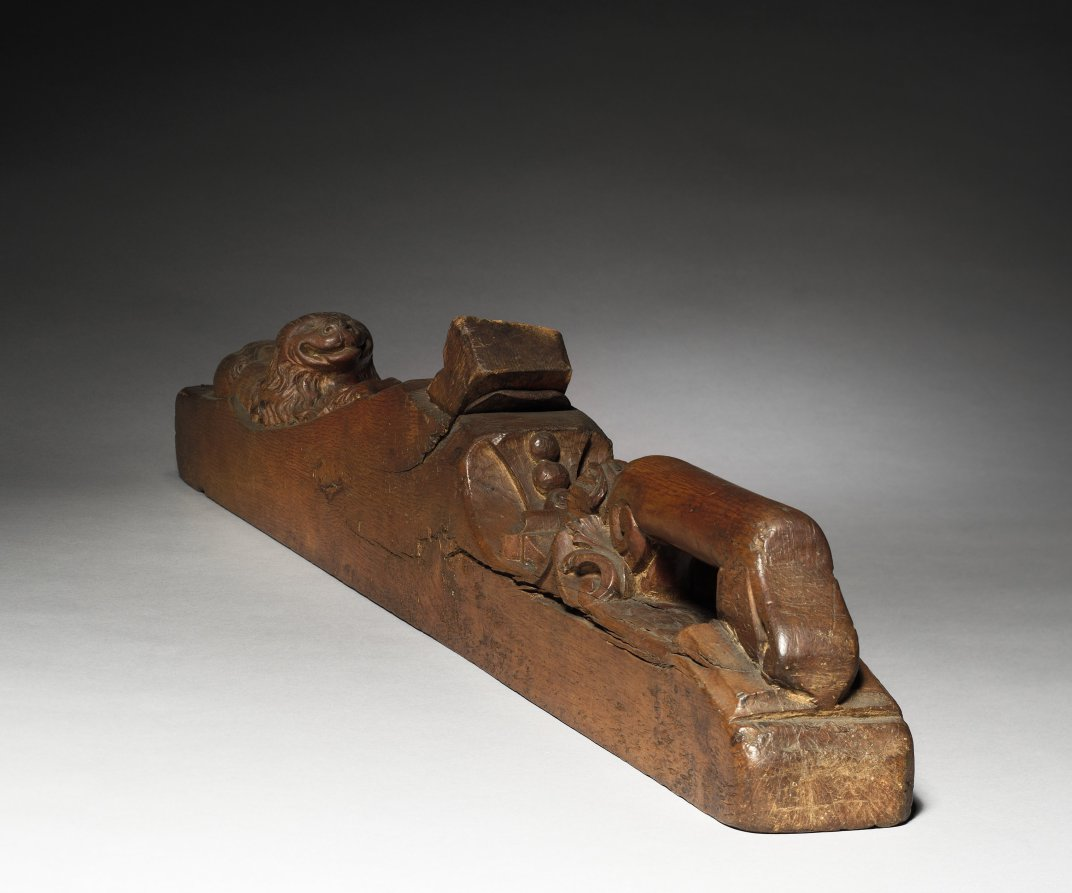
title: Plane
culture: Spain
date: 1600s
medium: oak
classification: Tool